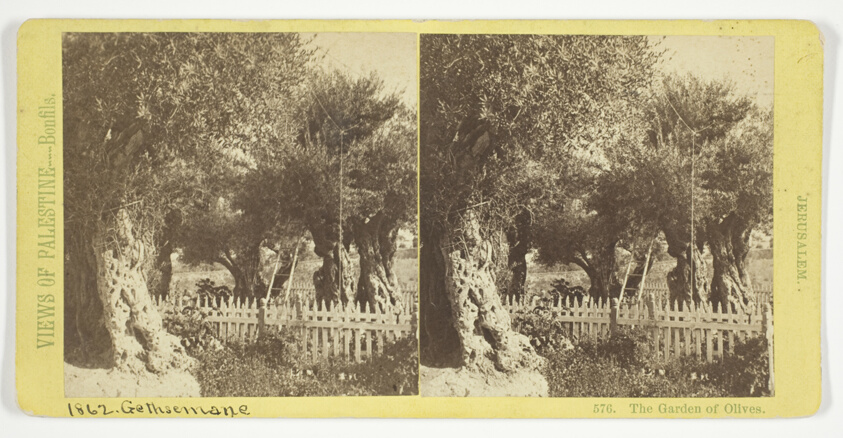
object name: Photograph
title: The Garden of Olives, Jerusalem, No. 576 from the series "Views of Palestine"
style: 19th century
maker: Félix Bonfils (French, 1831–1885)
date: 1860/85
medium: Albumen print, stereo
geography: France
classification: stereograph (albumen); albumen silver print; photographic process; photography; photograph